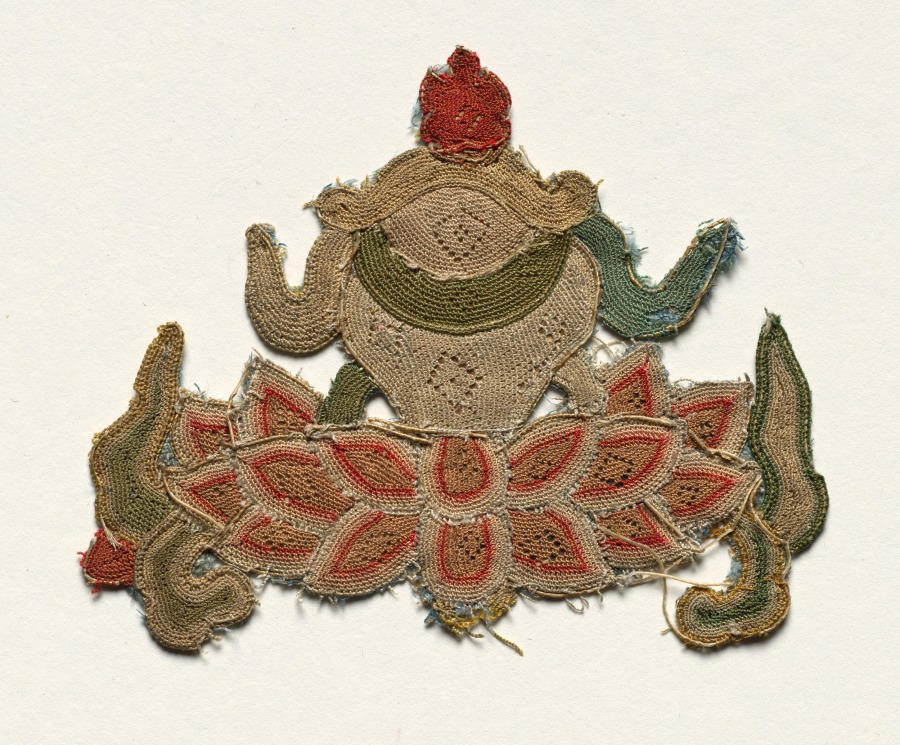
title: Fragment of Lotus Flower surrounded by Leaves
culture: China, 14th century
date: 1300s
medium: embroidery, needlelooping; silk and gold thread, silvered and gilded paper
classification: Embroidery